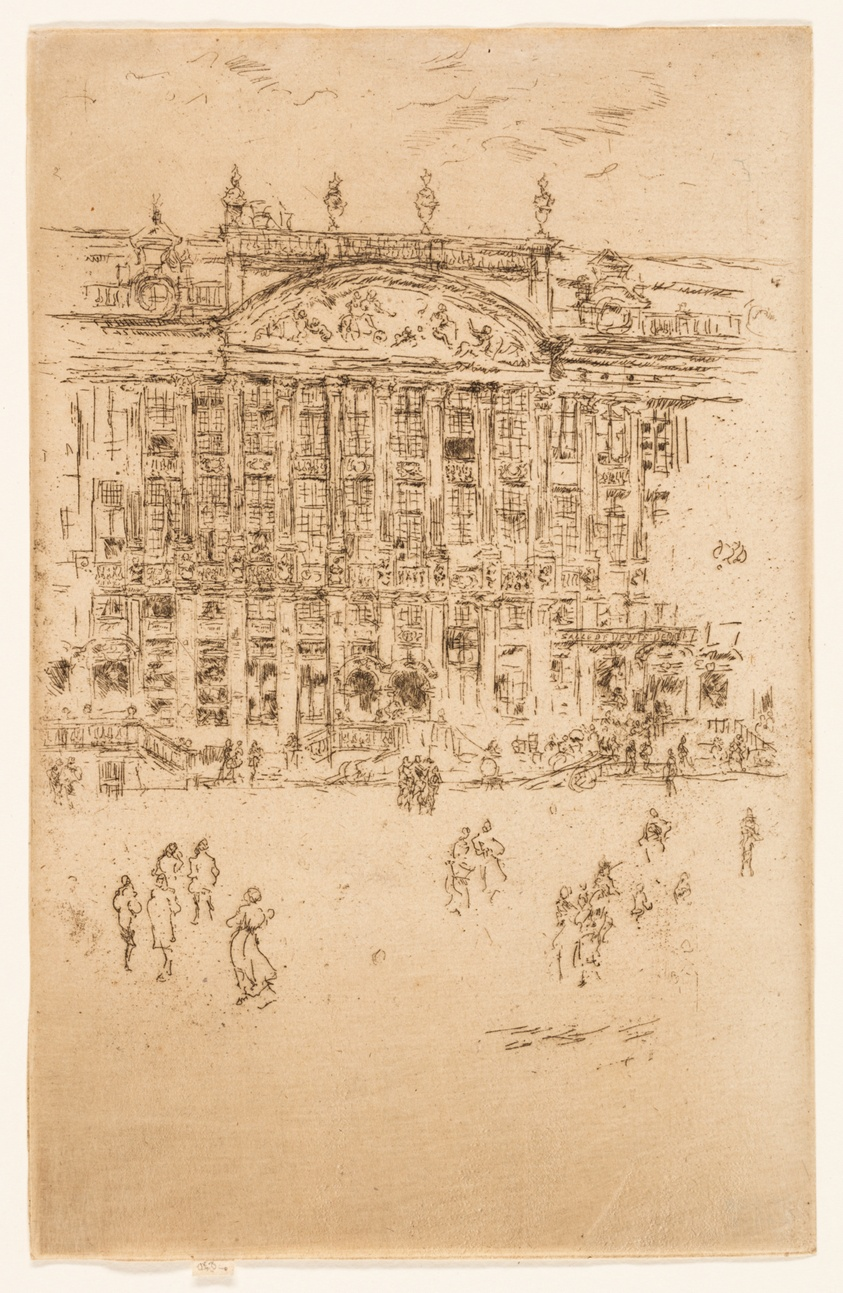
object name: Print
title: Grand' Place, Brussels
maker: James McNeill Whistler (American, 1834-1903)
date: 1887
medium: Etching and drypoint with foul biting in black ink on cream laid paper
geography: United States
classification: etching; drypoint; print; prints and drawing; foul biting; paper